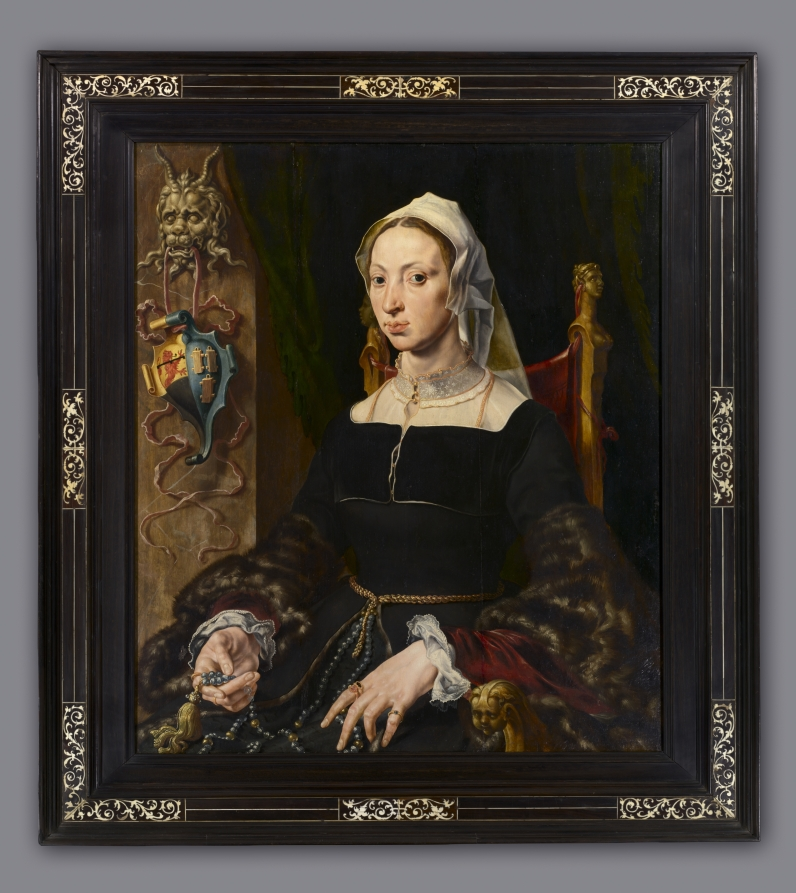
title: Portrait of Machtelt Suijs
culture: Flanders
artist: Maerten van Heemskerck (Dutch, 1498–1574)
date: c. 1540–45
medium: oil on wood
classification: Painting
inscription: note on cradle appears on a notation in chalk (originally) slightly scratched faintly letters " Mr A.M.C [?] or K [?] Reyve"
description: Maerten van Heemskerck lived in Rome for four years (1532–36) and was deeply affected by the city's art and antiquities. Here, the half-length, seated figure, the tense yet elegant hands, and even the grotesque classical mask reflect the impact of that experience, while the love of meticulously represented textures is traditionally associated with northern European art. Machtelt Suijs married Dirick van Teijlingen in 1535 and lived in Alkmaar (the Netherlands), where Heemskerck must have painted her. The coat-of-arms that hangs from the mask combines family emblems, indicating that her portrait must have been accompanied by one (now lost) of her husband.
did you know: The coat of arms depicts golden pile drivers, indicating the family construction business.